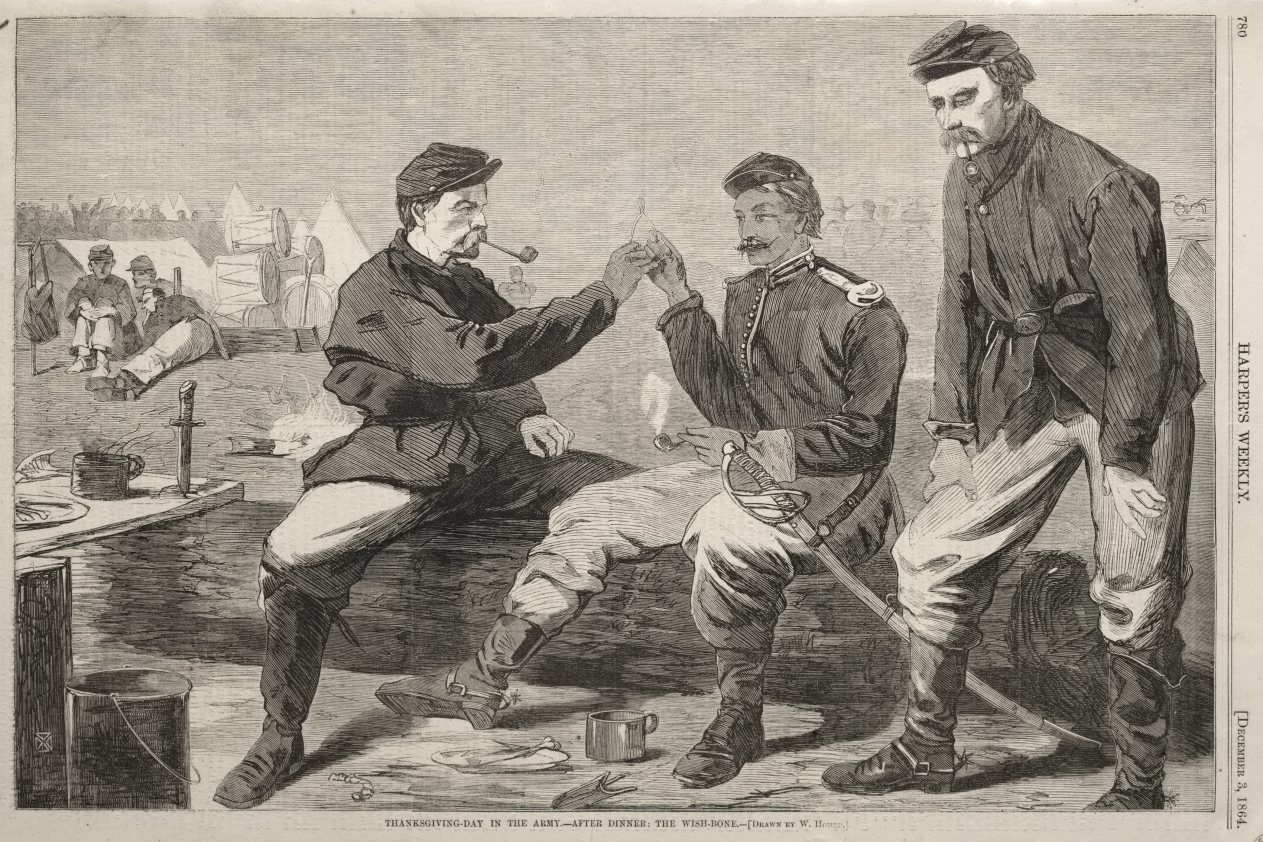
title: Thanksgiving Day in the Army - After Dinner: The Wish-Bone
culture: America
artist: Winslow Homer (American, 1836–1910)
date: 1864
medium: wood engraving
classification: Print